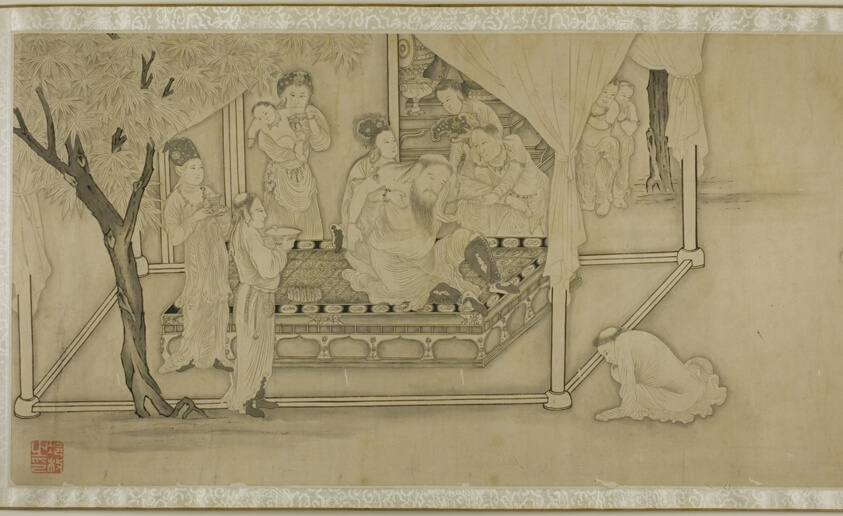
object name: Painting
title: Drinking and Dancing before the Tribal Chief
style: Chinese (culture or style)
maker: Leng Mei (Chinese, 1669-1742)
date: Qing dynasty (1644–1911), late 17th to early 18th century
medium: Handscroll; ink on paper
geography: China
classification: drinking vessel; handscroll; painting; asian art